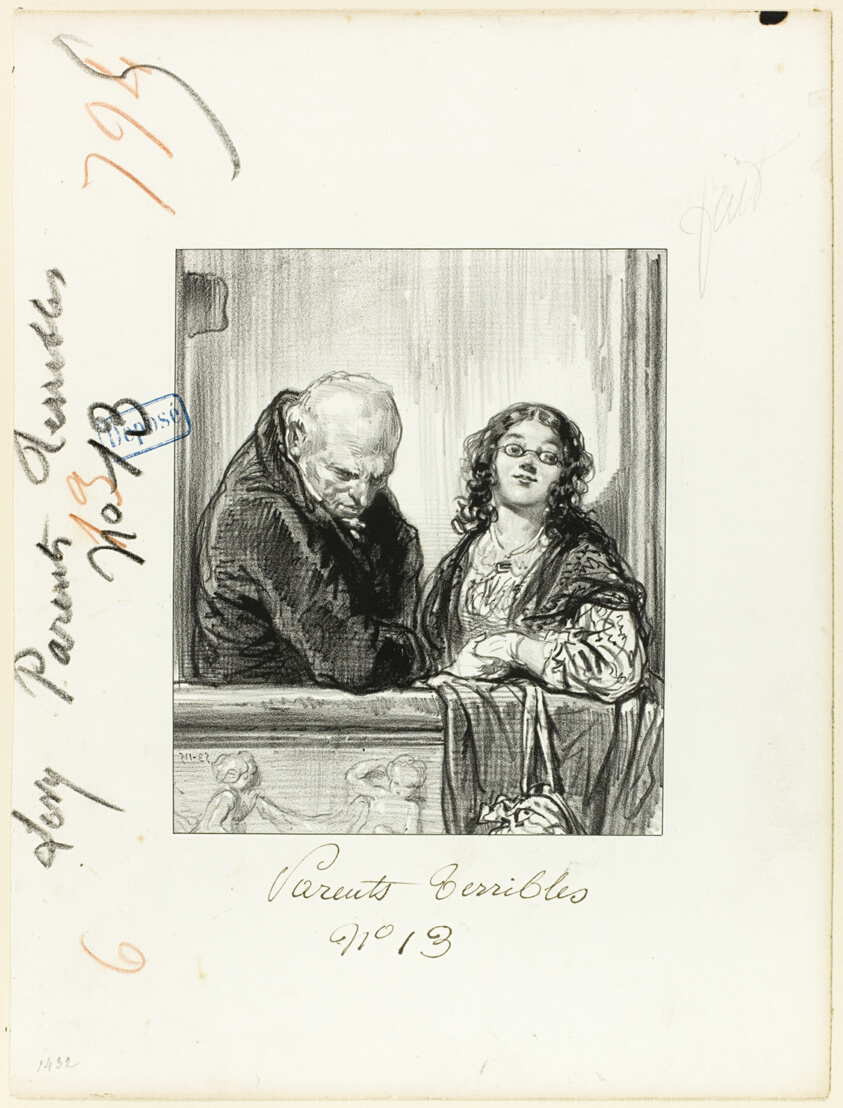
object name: Print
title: Les-Parents-Terribles series: A lovely play, always the same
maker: Paul Gavarni (French, 1804-1866)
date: 1853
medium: Lithograph in black on cream wove paper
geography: France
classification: lithograph; print; prints and drawing